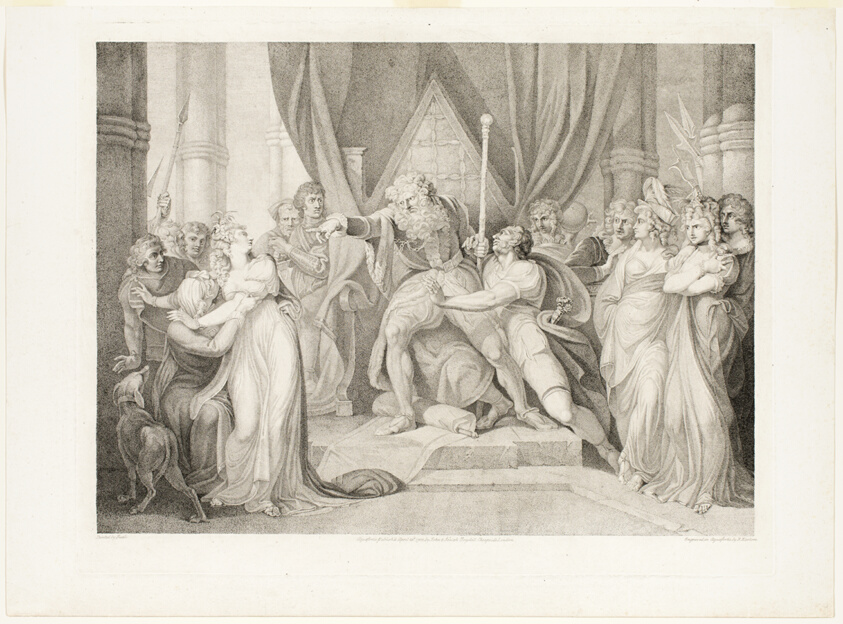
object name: Print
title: Lear Casting out his Daughter Cordelia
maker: Richard Earlom (British, 1743-1822); after Henry Fuseli (Swiss, active in England, 1741-1825)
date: 1792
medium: Etched-stipple proof on ivory laid paper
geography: England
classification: etching; print; prints and drawing